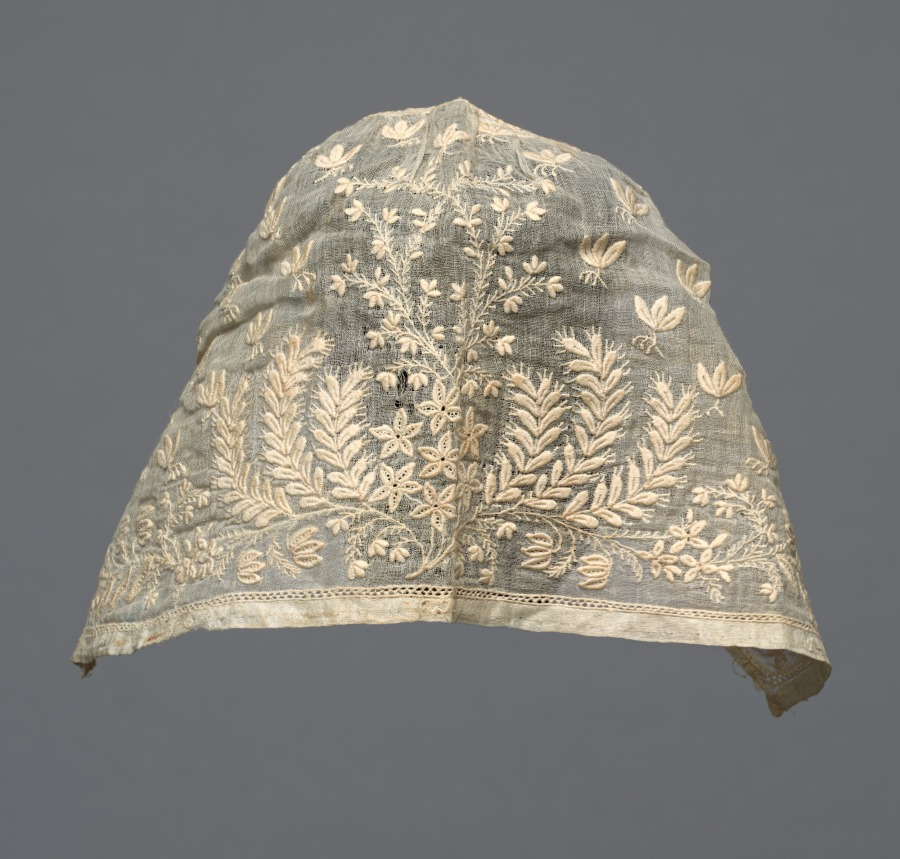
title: Cap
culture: America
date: c. 1836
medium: Linen: embroidered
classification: Embroidery